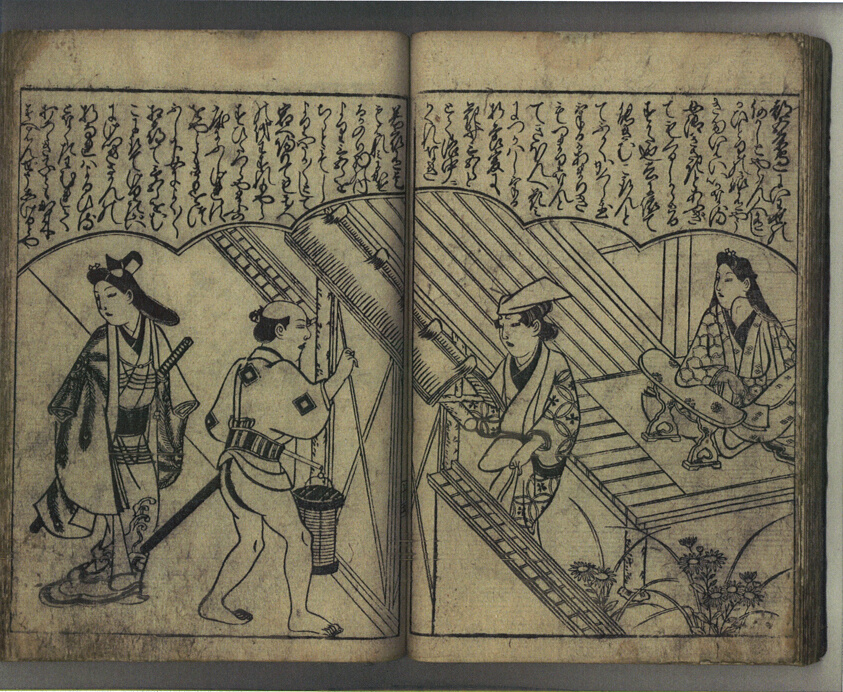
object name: Book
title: Pleasure with the Beauties of Japan (Wakoku bijin asobi)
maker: Hishikawa Moronobu (Japanese, died 1694)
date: c. 1673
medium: Woodblock-printed book, sumizuri-e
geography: Japan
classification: book